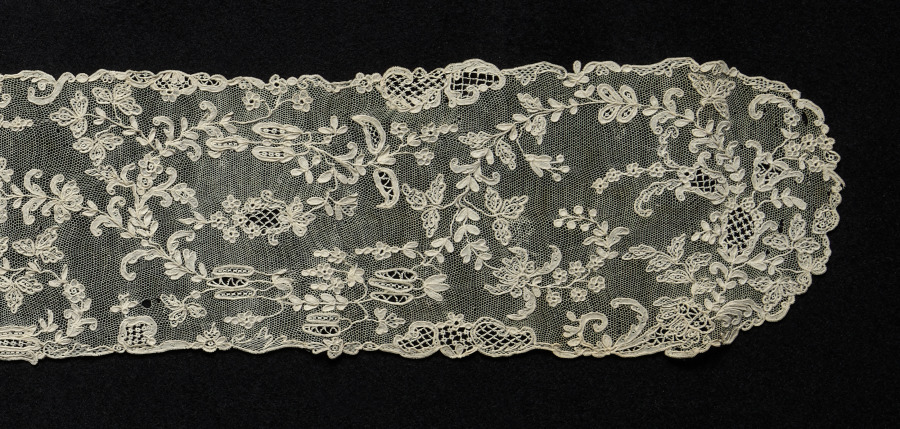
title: Lace Lappet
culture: France, Alençon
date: 1715–74 (Louis XV period)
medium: Linen: needle lace (Alencon lace)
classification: Lace